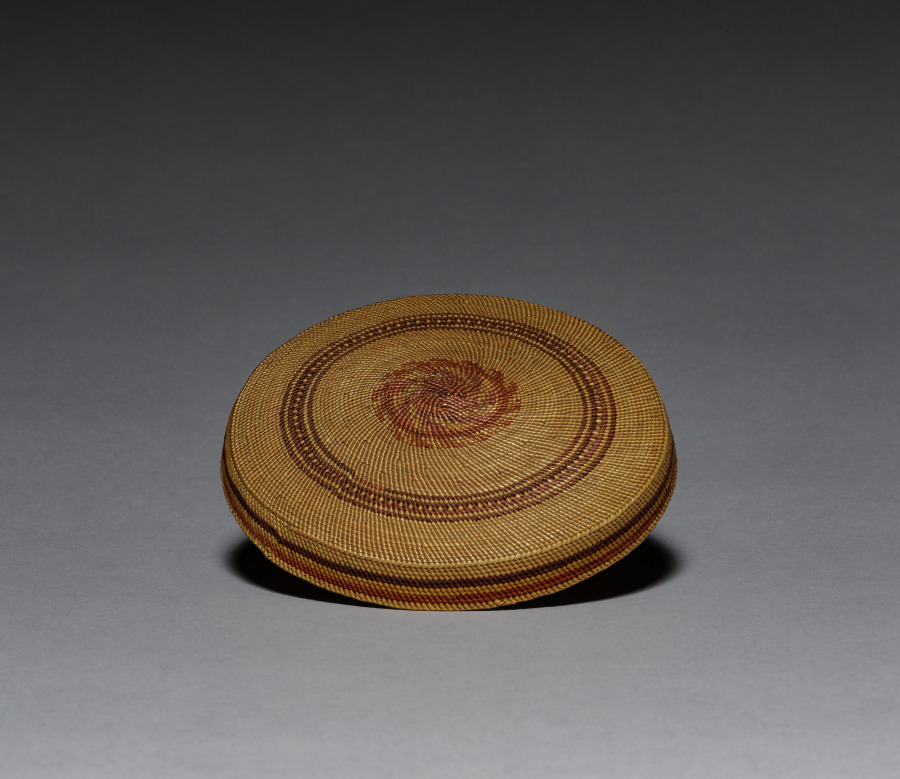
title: Lid for Bowl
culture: Northwest Coast, Makah, late 19th century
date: c 1900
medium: Cedar bark, deer grass; wrapped twining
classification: Basketry